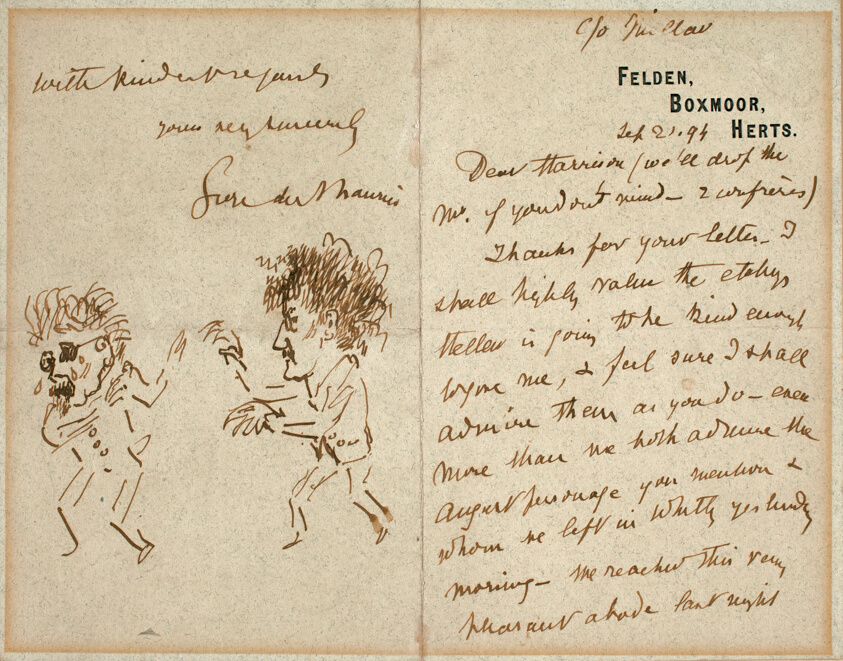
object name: Drawing and Watercolor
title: Letter with Drawing of Whistler Menacing Du Maurier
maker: George Du Maurier (English, 1834-1896)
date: 1894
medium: Pen and brown ink on blue wove paper, with embossed printing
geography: France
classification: pen and ink drawings; drawings (visual works); prints and drawing